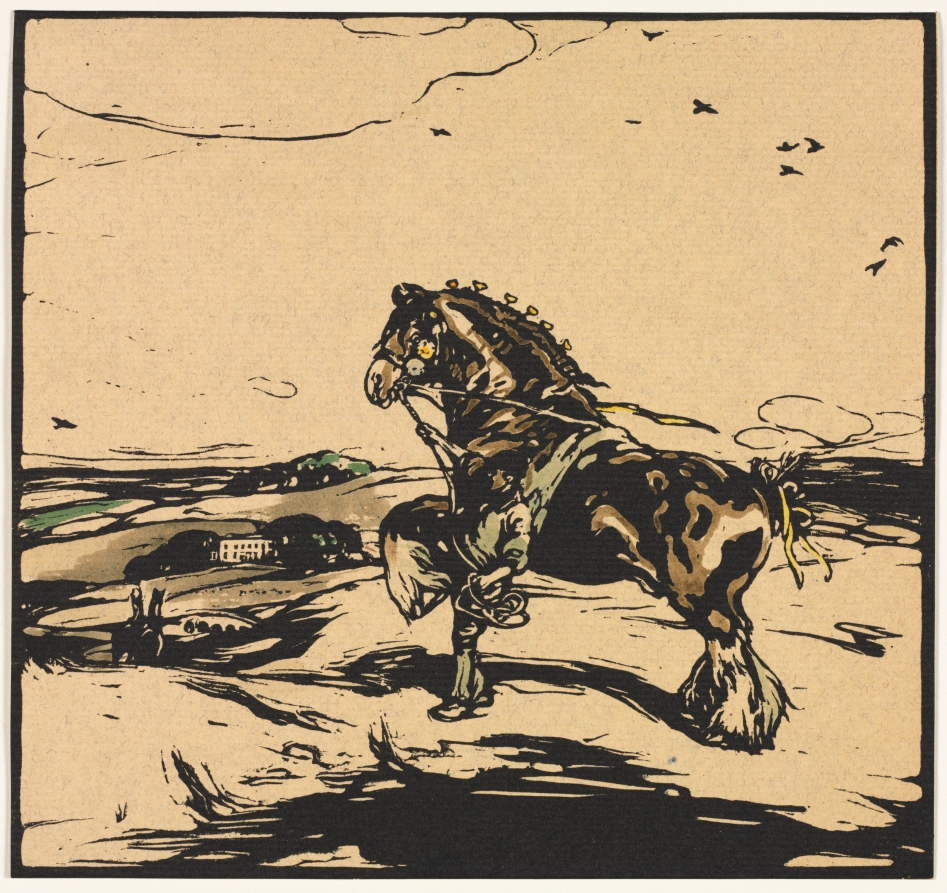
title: The Shire Horse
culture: England, early 20th century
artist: William Nicholson (British, 1872–1949)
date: 1904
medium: woodcut with hand coloring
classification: Print